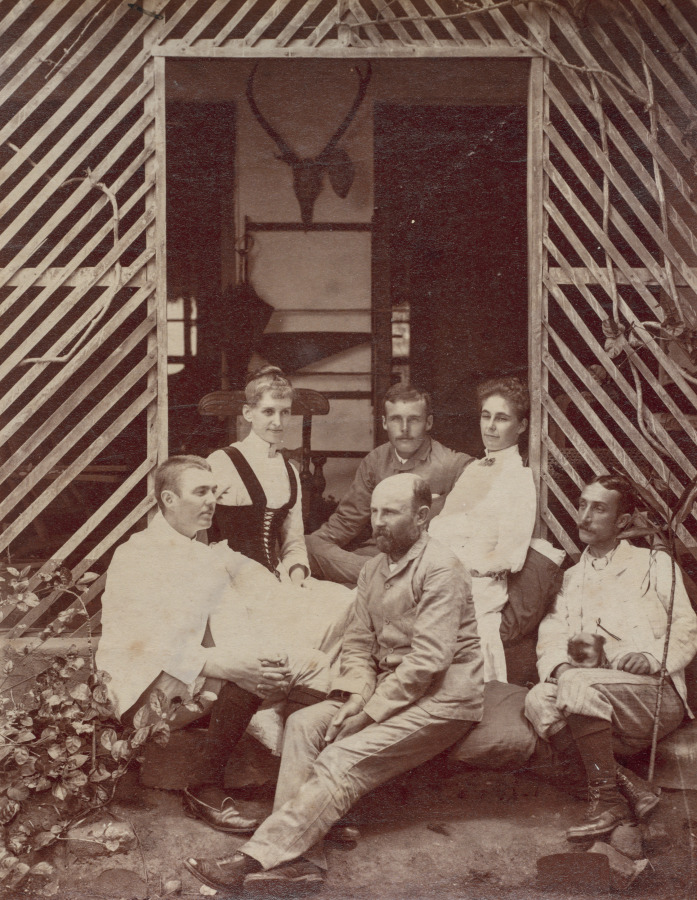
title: Group Taken at Nortekande Bungalow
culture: India, 19th century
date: c. 1880s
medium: albumen print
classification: Photograph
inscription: Written in pencil on verso: “Group taken at Nortekande Bungalow”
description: Colonial life offered amusements. Here, a group enjoying a leisurely afternoon poses in front of a rustic bungalow. The skull with horns inside is a trophy from the hunt. The woman’s laced up vest, along with the name in the title, suggest that this group may contain Austrian, German, or Scandinavian members rather than just the British.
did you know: The quality of the photograph and the careful arrangement of the group suggest this may have been taken by a professional photographer.